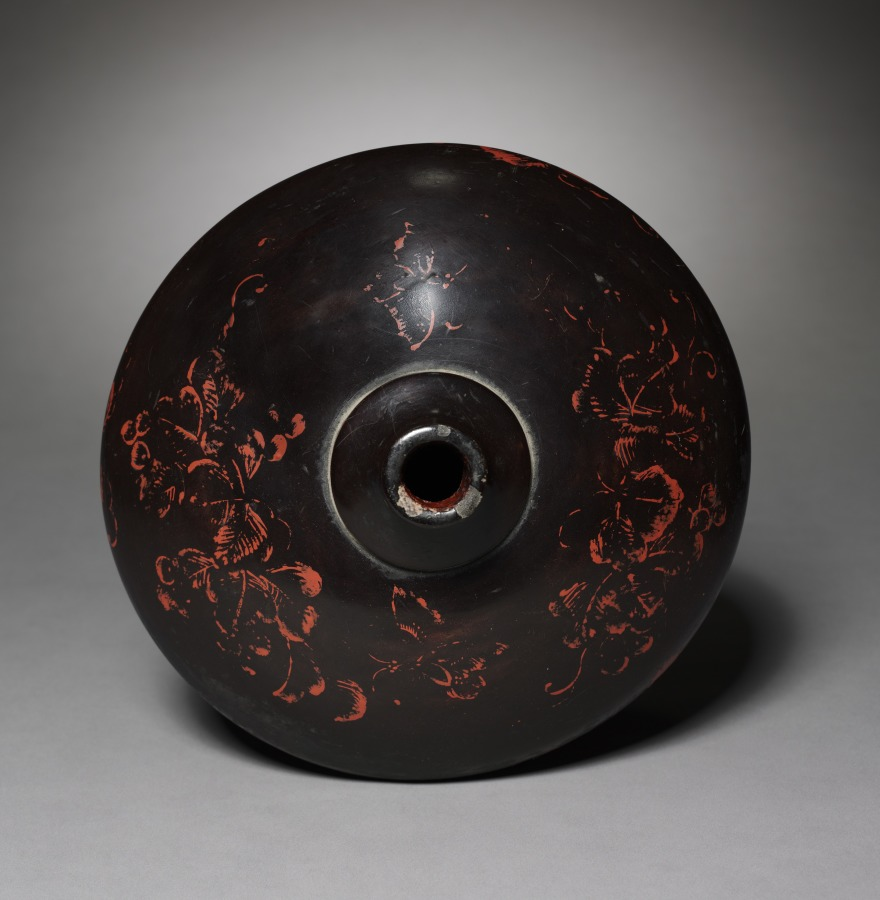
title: Sake Flask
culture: Japan, Muromachi period (1392–1573)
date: 1500s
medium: Black laquered wood with red lacquer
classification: Lacquer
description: This flask contained rice wine, or sake. Its wood body was shaped by a lathe before black lacquer was applied to the surface. A red lacquer design of grapevines, an auspicious motif, covers the surface. With their numerous, long-lasting fruits, grapevines traditionally symbolized fertility and longevity in East Asia.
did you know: The evocative imagery of brushed leaves and bunches of grapes suggest that the artist referred to a particular painting when decorating this vase.